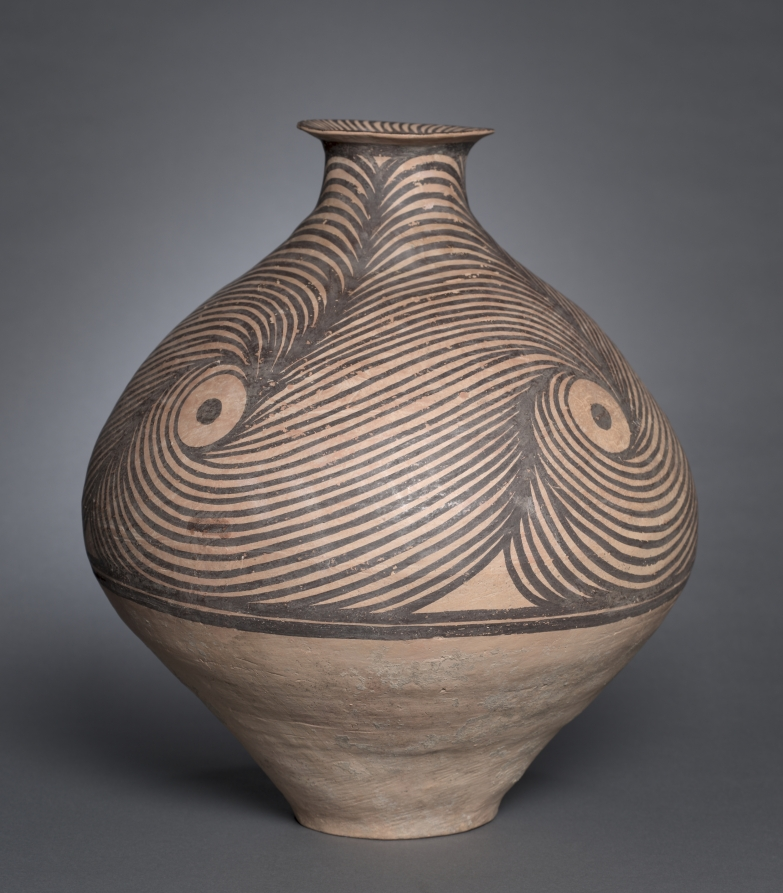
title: Jar with Spiral Designs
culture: Northwest China, Neolithic period, Majiayao culture, Majiayao phase (3300–2650 BCE)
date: 3300–2650 BCE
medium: earthenware with slip-painted decoration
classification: Ceramic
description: This jar is a spectacular example of painted pottery from the Majiayao culture, one of the regional cultures of prehistoric China. Its geometric patterns are probably abstract symbols transformed from a bird image, which may suggest a clan totem or nature spirits. Archaeological work confirms the coexistence of different regional cultures in ancient China, contesting the old belief that the Chinese civilization originated solely along the Yellow River. The artifacts of these cultures manifest distinctive characteristics; each one played a role in the formation of the greater Chinese civilization.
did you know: The spiral designs on this jar were made using an ancient Chinese pottery technique called slip painting.